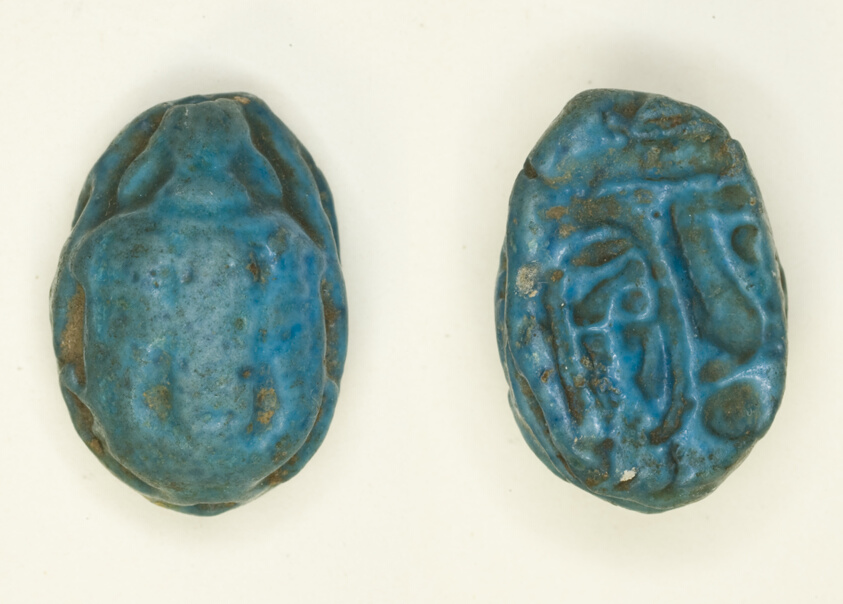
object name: Costume and Accessories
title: Scarab: Usermaatra Setepenra (Ramesses II)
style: new kingdom, ramesside period, ancient, nineteenth dynasty, egyptian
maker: Egyptian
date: New Kingdom, Dynasty 19, Reign of Ramesses II (about 1279–1213 BCE)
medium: Faience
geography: Egypt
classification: scarab; ceramics; jewelry; ancient art; amulet; costume; faïence (composite material)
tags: scarab beetle, snakes, serpents, pharaohs, kings, king, Hieroglyphs, cartouches